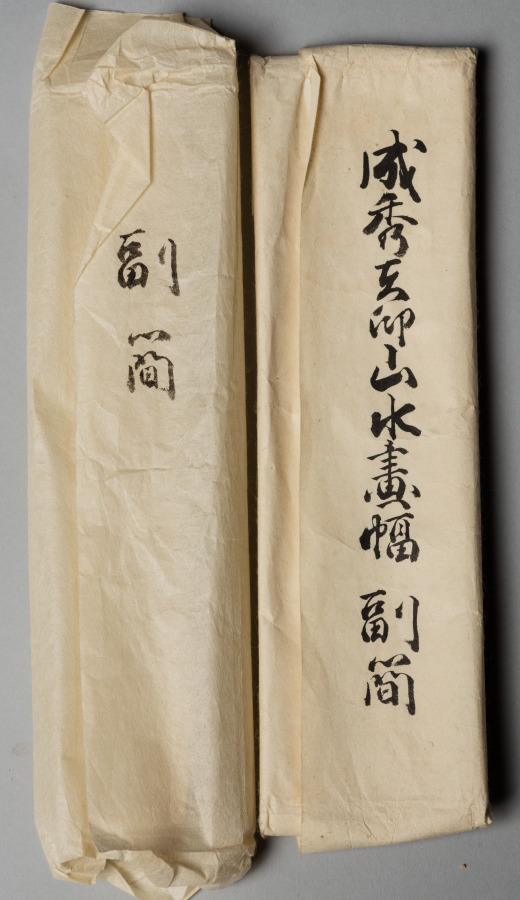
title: Landscape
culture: Japan, Muromachi period (1392–1573)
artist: Narihide (Japanese, active 1500s)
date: 1500s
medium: hanging scroll; ink on paper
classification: Painting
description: This composition includes imagery from the Eight Views of the Xiao and Xiang Rivers. Scanning the composition from top to bottom, at least six of the views are discernible: night rain over Xiao and Xiang, evening bell from a mist-shrouded temple, returning sails off a distant shore, geese descending to a sandbar, mountain village in clearing mist, and sunset glow over a fishing village. Inside the painting’s box is a document with a long inscription by prominent calligrapher, collector, and connoisseur Maeda Kōsetsu (1841–1916) discussing the painting’s subject and the matter of the painter’s biography—he appears to have been a Kano school artist, but his precise identity is unclear.